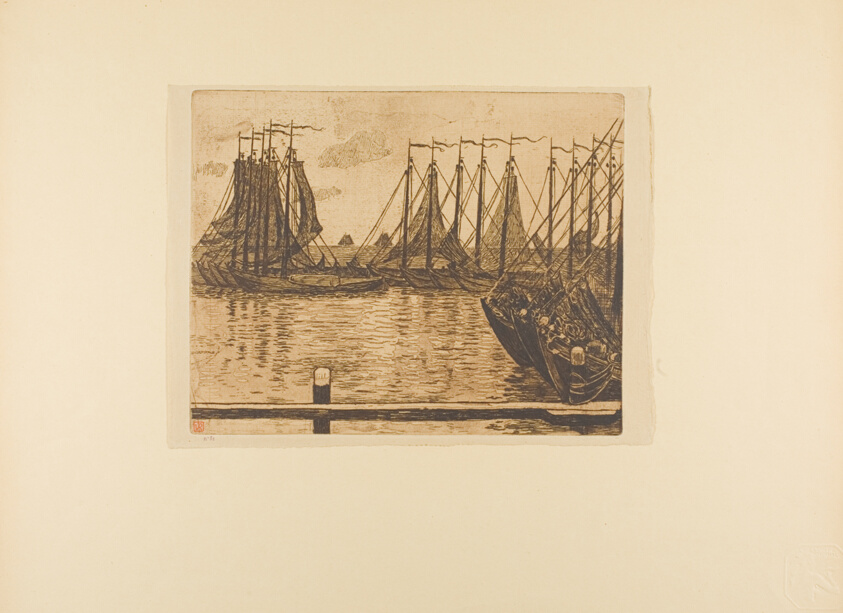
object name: Print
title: Fishing Fleet, from the seventh album of L'Estampe originale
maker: Théo van Rysselberghe (Belgian, 1862-1926); published by L'Estampe originale (French, 1893-1895)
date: 1893, published 1894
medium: Etching and aquatint with burnishing, from two plates, in brown, on tan laid paper, tipped to tan wove paper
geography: Belgium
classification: etching; print; prints and drawing